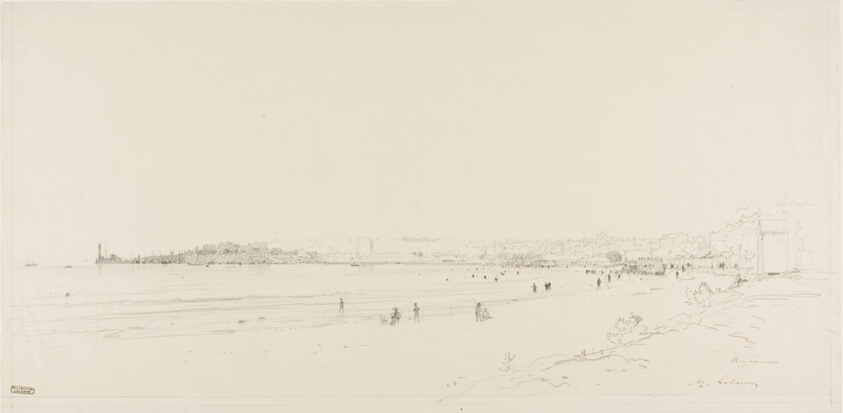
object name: Drawing and Watercolor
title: The Beach at Royan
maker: Maxime Lalanne (French, 1827-1886)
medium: Graphite on cream wove paper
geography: France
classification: graphite; drawings (visual works); prints and drawing